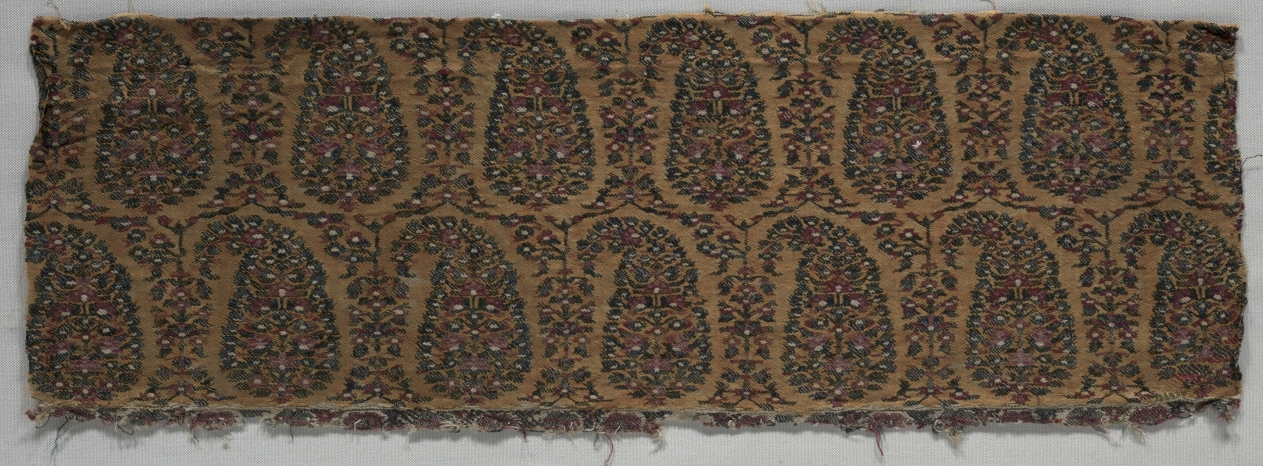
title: Fragment of a Shawl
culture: India, Kashmir, 19th century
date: 1800s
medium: tapestry weave: wool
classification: Textile